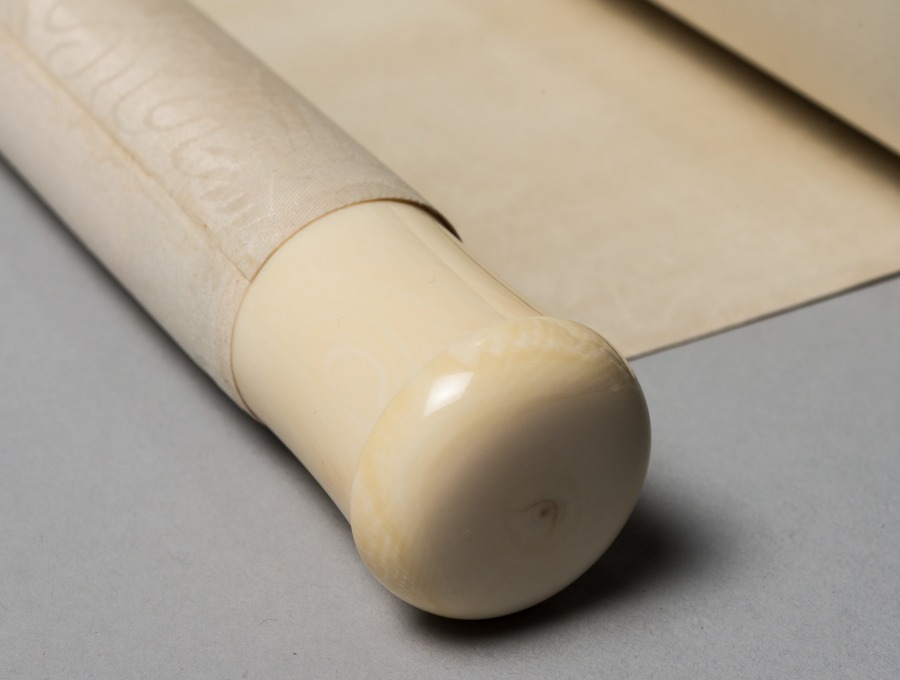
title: Thin Forest and Distant Mountains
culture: China, Ming dynasty (1368–1644)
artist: Li Liufang (Chinese, 1575–1629)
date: 1628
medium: hanging scroll, ink on paper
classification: Painting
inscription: Artist's inscription, signature, and 2 seals: Thin forest and distant mountains have always attracted me; As if they were from the brush and ink of Ni Tsan, left behind by the master in this mortal world. Now that the quiet recluse has chosen to live in the South of the City. He paints the spring breeze---over a curve of the river. In the spring day of the wu-ch'en year [1628] I made this painting and attached an old poem. Li Liu-fang [seals] Li Liu-fang-yin; Chang-heng shih. trans. WKH 1 additional seal of Chung Wen-ming (17th c.).